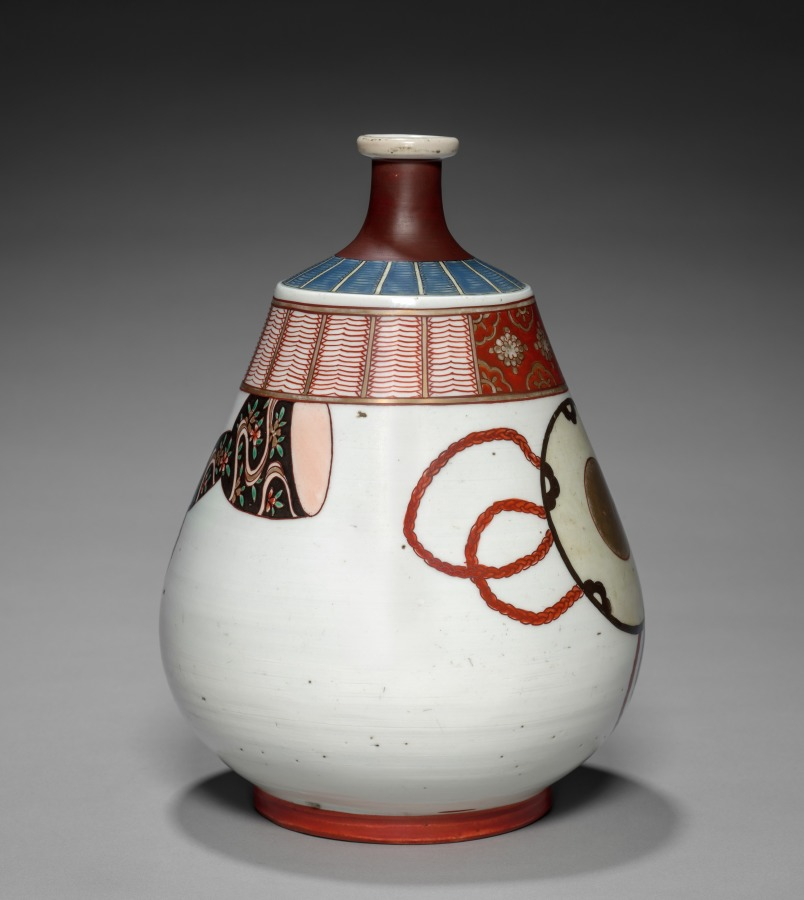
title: Bottle-Flask with Drums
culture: Japan, Edo period (1615–1868)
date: 1700s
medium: porcelain with overglaze color enamel (Hizen ware, Arita type, Imari style)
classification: Ceramic